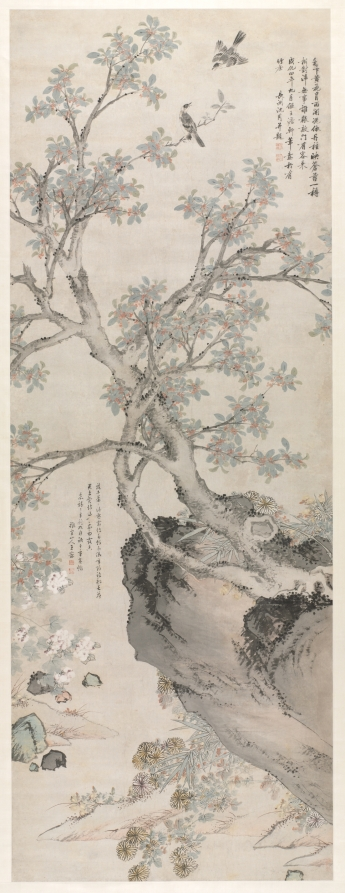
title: Yellow Chrysanthemums and Red Osmanthus in the Style of Wang Yuan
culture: China, Ming dynasty (1368–1644)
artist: Shen Zhou (Chinese, 1427–1509)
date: 1468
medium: hanging scroll, ink on paper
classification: Painting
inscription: Artist's inscription, signature, and 2 seals at upper right: Beneath the fence yellow [chrysanthemum] flowers brave the rain to blossom;/ Still others lean on the red osmanthus tree and dazzle the deep green moss./ With a goblet [of wine] I face them, entirely without concern;/ Who will answer the knocking at the gate where a guest has arrived? In the ninth month of the fourth year of the Chenghua era [1468], I followed the brush-conception of Wang Danxuan 王澹軒 [Wang Yuan 王淵] at the Youzhuzhuang 有竹庄 [House with Bamboo]. Inscribed and [painted] by Shen Zhou 沈周 of Changzhou 長洲. [seals] Shitian 石田; Shen shi Qinan 沈氏启南. trans. HR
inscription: 1 additional inscription, dated 1523, and 2 seals of Wang Chong 王寵 (1494-1533).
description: Shen Zhou, a native from Suzhou, was descended from a prominent land-owning family with strong ties to literati culture. Because Shen Zhou never entered government service, he had ample opportunity to cultivate the arts of painting, poetry, and calligraphy. Chrysanthemums and red osmanthus both bloom in autumn. The deep orange osmanthus flowers emanate a characteristically sweet fragrance. According to his inscription on the painting, Shen Zhou sought to imitate the style of the Yuan dynasty (1271–1368) painter Wang Yuan. His color-filled brushstrokes and washes, however, anticipate the flower painting style of Yun Shouping, whose Peonies are also in the Cleveland Museum of Art collection, https://www.clevelandart.org/art/1967.192. The sheer size and complex composition of this scroll are impressive.